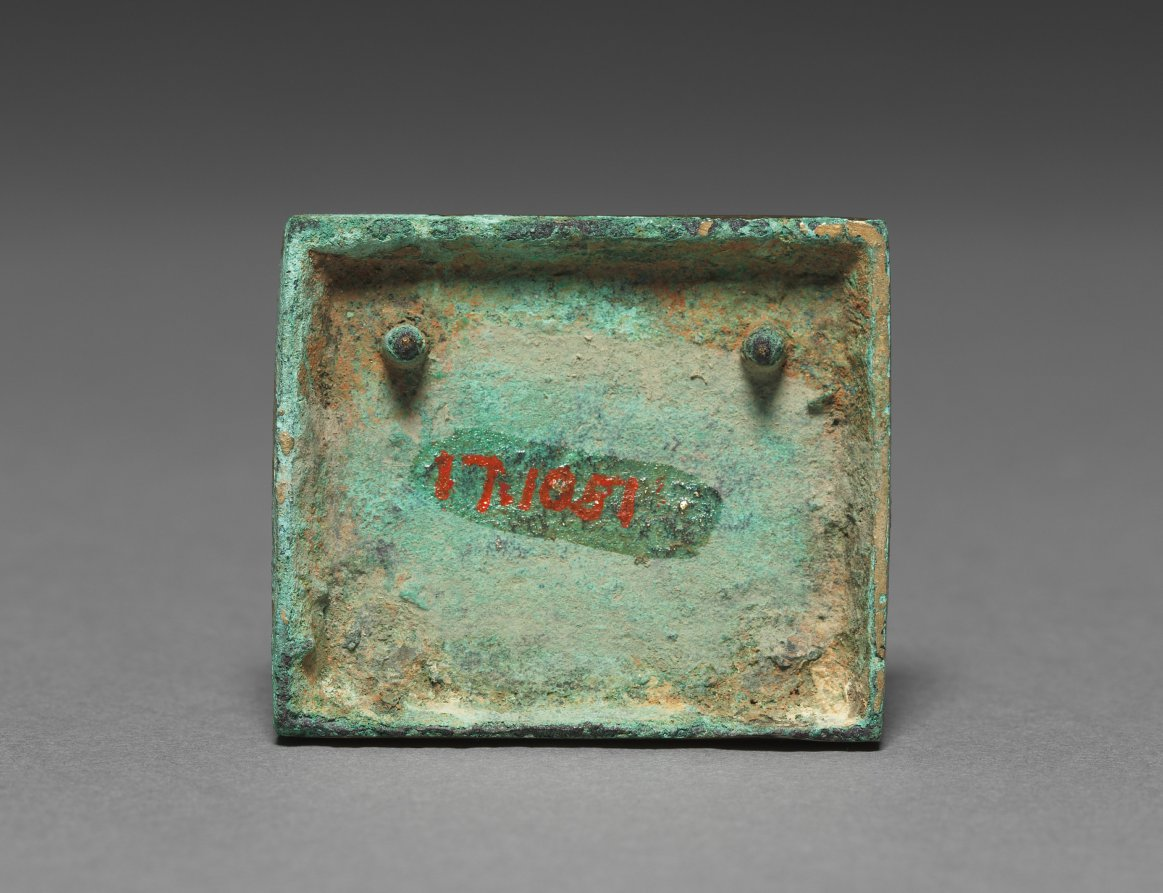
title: Belt Ornament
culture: Korea, Goryeo dynasty (918–1392)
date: 918–1392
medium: bronze gilt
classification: Metalwork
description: Metallurgy advanced remarkably in the Goryeo period (918-1392), explaining why a large quantity of sophisticated metal artifacts with delicate designs were used not only as daily accessories but also as burial goods. Belt ornaments like this example were fixed to leather belts.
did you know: The Japanese antique dealer Yamanaka & Company, which opened its branches in New York (1895) and Boston (1899) sold small Korean archaeological materials such as this belt ornament to American collectors in the early 20th century.